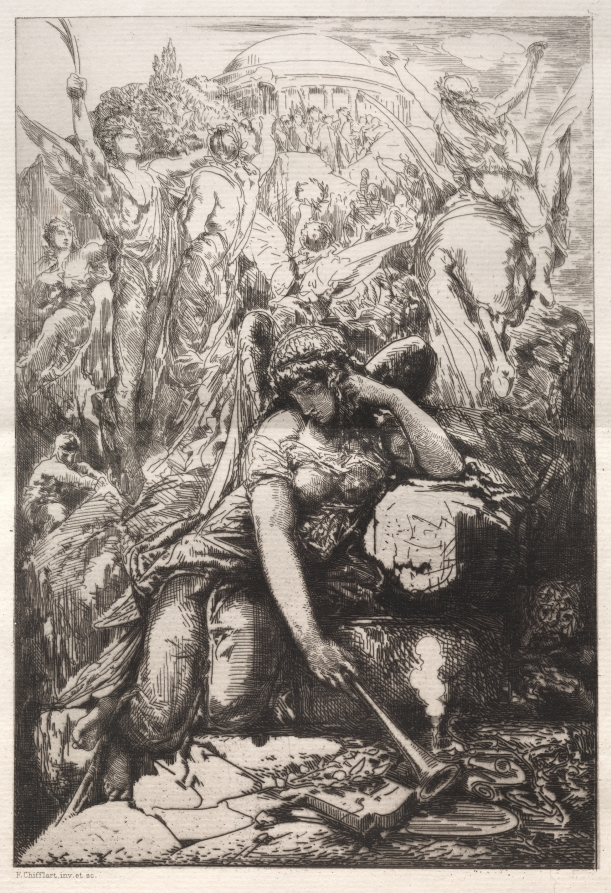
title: Melancholy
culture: France, 19th century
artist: Nicolas-François Chifflart (French, 1825–1901)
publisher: Francois Liénard, Paris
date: 1877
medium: etching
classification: Print